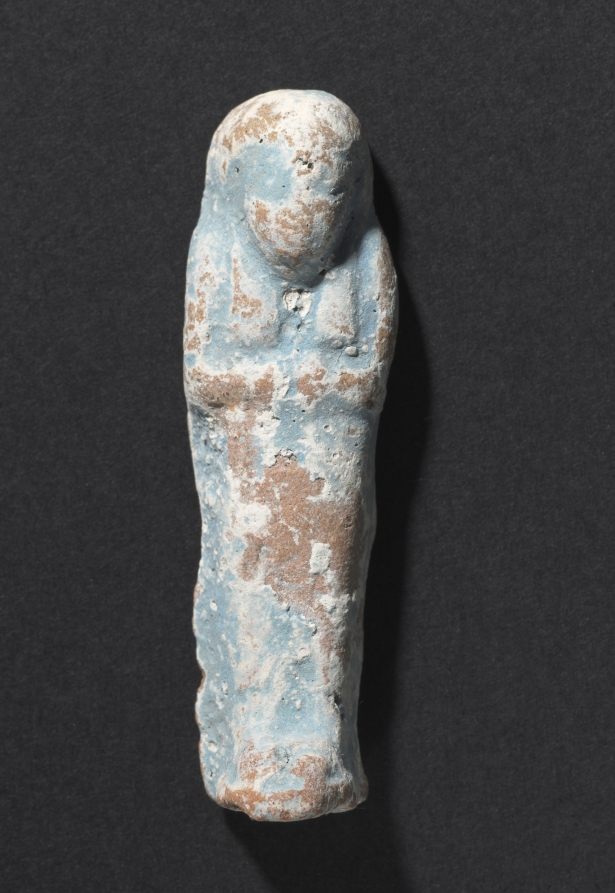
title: Shawabty of Ditamenpaankh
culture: Egypt, Late period (715–332 BCE), Dynasty 25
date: 715–656 BCE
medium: terracotta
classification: Funerary Equipment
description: High demand for shawabtys in the Late Period, a time when as many as 400 or more shawabtys were placed in the tomb with the deceased, gave rise to a specialized container for storing them: the shawabty box. This example is inscribed for the lady of the house, Ditamenpaankh, and was probably one of a pair originally made for her. The single-masted boat on the box's lid is perhaps an allusion to the pilgrimage of the deceased to the holy city of Abydos, the cult city of Osiris, king of the dead. The shawabtys inside are crude, mass-produced examples cast in an open mold. Made of terracotta, their blue paint imitates more costly shawabtys made of faience. As for the shawabty spell, it has been removed from its traditional location on the shawabty's front and relocated onto the sides of box, where it needed only to be written once, thus expediting production.